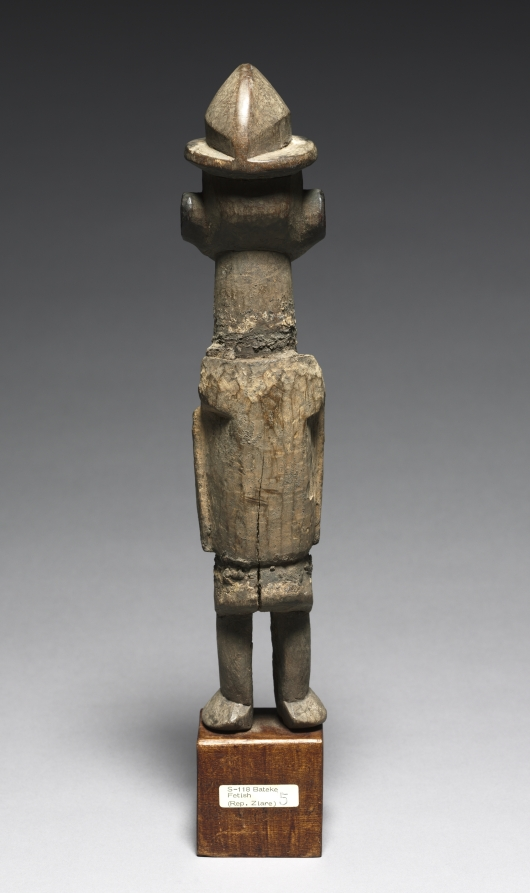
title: Male Figure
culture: Africa, Central Africa, Republic of the Congo or Democratic Republic of the Congo, Teke-style maker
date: early 1800s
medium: Wood and organic materials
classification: Sculpture